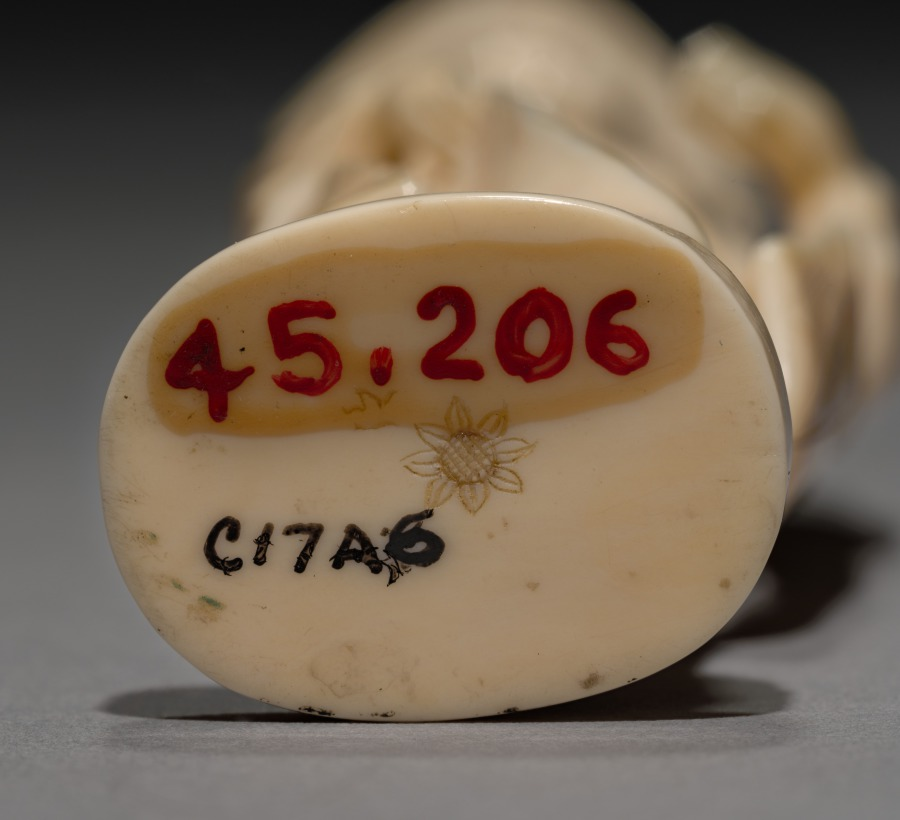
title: Woman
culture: Japan, Meiji period (1868–1912)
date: early 1900s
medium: ivory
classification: Ivory